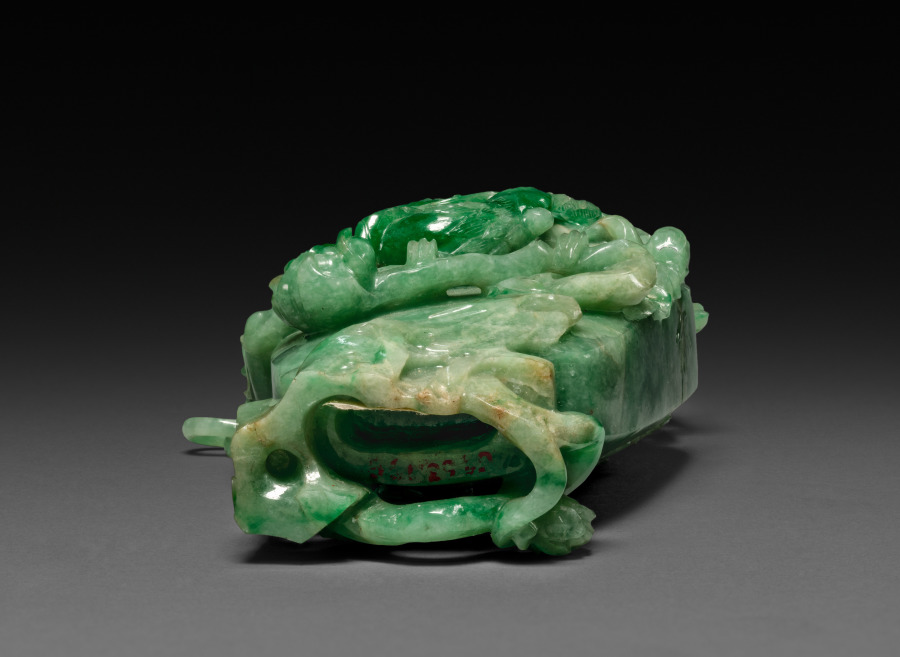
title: Three-Sectional Altar Group: Cylindrical Carving with Phoenix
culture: China, Qing dynasty (1644-1911)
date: 1644–1911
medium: jade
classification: Jade